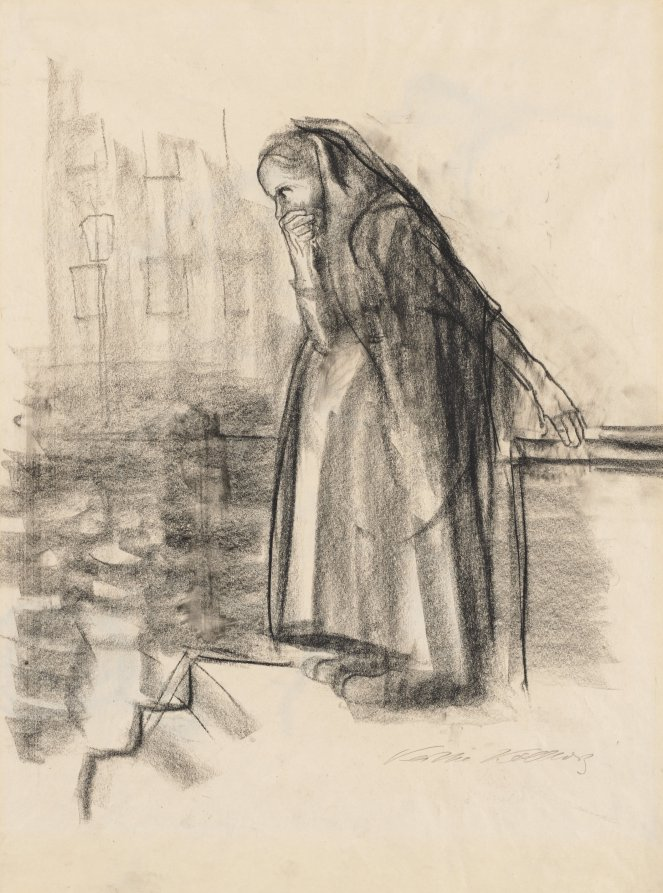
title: Pregnant Woman Contemplating Suicide (recto)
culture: Germany, 20th century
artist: Käthe Kollwitz (German, 1867–1945)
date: c. 1926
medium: black chalk or charcoal? (rubbed in places)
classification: Drawing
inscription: signed, lower right, in graphite: Kathe Kollwitz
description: Working in a frank but emotional naturalistic style far different from that of her contemporaries, Käthe Kollwitz depicted a pregnant woman who stands as a universal symbol of human grief. Just a few bold strokes of crayon relay the woman’s despair. After World War I, Kollwitz’s work focused on the sorrows of those left behind: the children, widows, and mothers who underwent loss, physical neglect, and economic hardship. Her focus on grief and despair in this and other works emerged especially after her youngest son, Peter, was killed in the first months of the war.